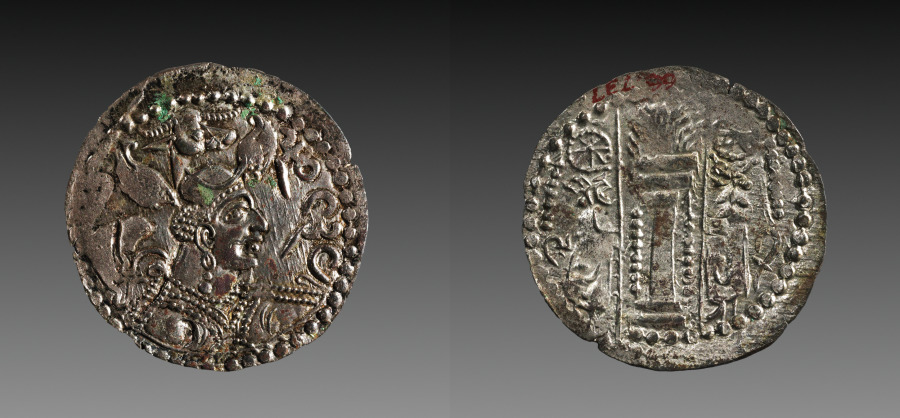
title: Drachm: Bust of Napki Malka (obverse): Fire Altar (reverse)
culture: Hephtalite, minted in Afghanistan, reign of Napki Malka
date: c. 450–500 CE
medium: silver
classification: Coins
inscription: 𐭭𐭩𐭪𐭩 𐭬𐭫𐭪